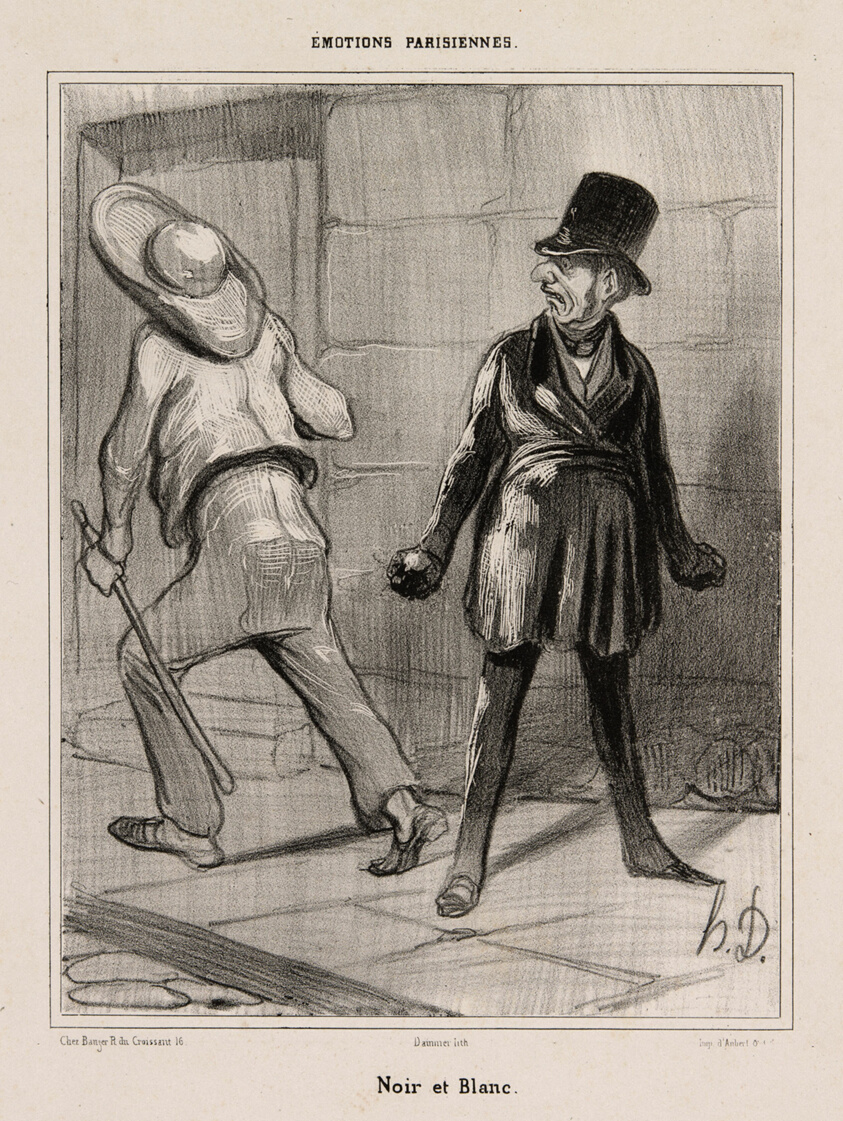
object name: Print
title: Black and white, plate 23 from Émotions Parisiennes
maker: Honoré Victorin Daumier; French, 1808-1879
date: 1840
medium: Lithograph in black on off-white wove paper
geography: France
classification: lithograph; print; prints and drawing